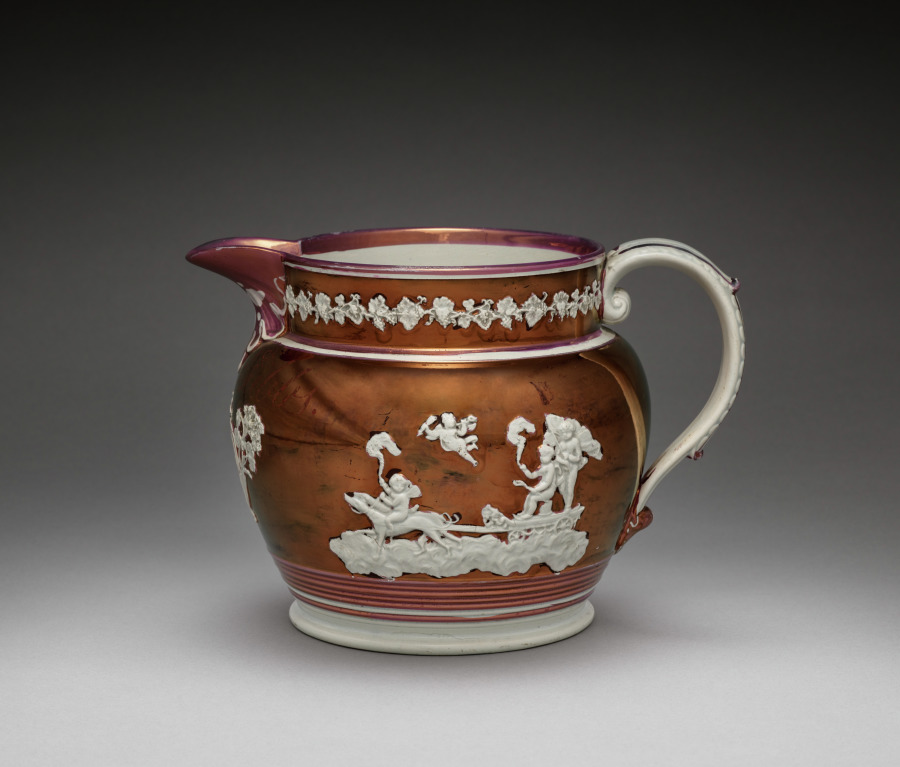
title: Pitcher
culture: England, Staffordshire, 18th century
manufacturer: Staffordshire Factory (British)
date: late 1700s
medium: lusterware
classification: Ceramic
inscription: engraved in script letters on body of pitcher directly under the lip: "T. C. Gibbs."